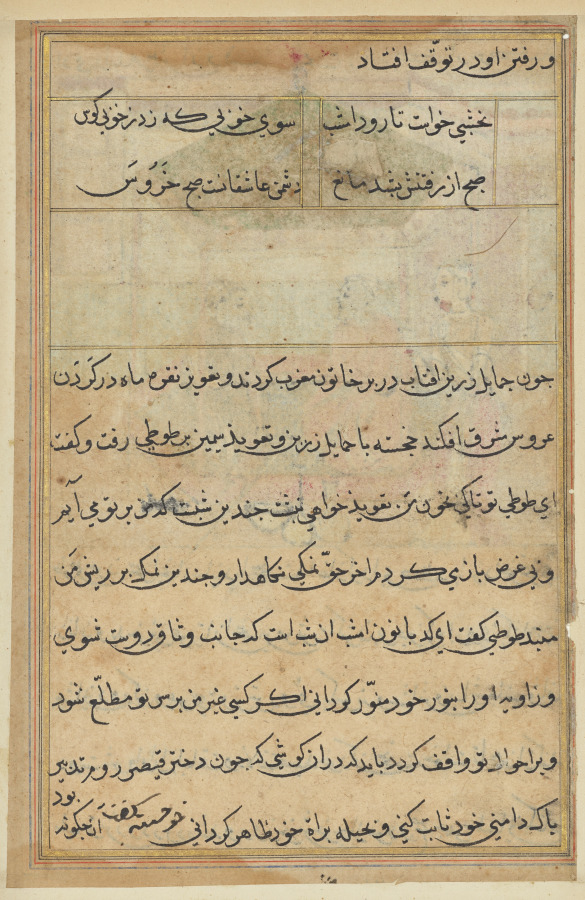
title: Page from Tales of a Parrot (Tuti-nama): text page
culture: Mughal India, court of Akbar (reigned 1556–1605)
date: c. 1560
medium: gum tempera, ink, and gold on paper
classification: Painting